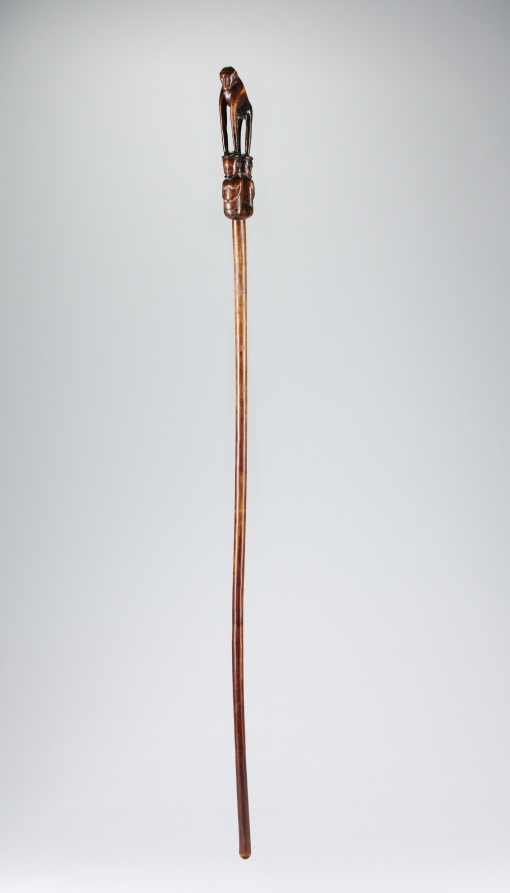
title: Staff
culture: Africa, South Africa, South Africa or Mozambique, probably Tsonga peoples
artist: The Baboon Master (probably Tsonga peoples)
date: 1800s–1900s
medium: Wood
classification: Sculpture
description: Arguably the finest surviving carving of the Baboon Master in a Western collection, this staff features exceptionally sophisticated articulation and detailing. The circular pokerwork motif on one side—which echoes the treatment of the ears on the male heads supporting the baboon—may represent a shield or a leaf. The heads feature the characteristic ornament that signifies maturity and marriage; covered with a mixture of gum, charcoal, and oil, this hairdo, called isicoco, employed a fiber or sinew ring into which the wearer’s hair was woven.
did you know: Artists working on the African continent often moved from place to place; the artist nicknamed The Baboon Master was of the Tsonga culture and worked in the Zulu kingdom.